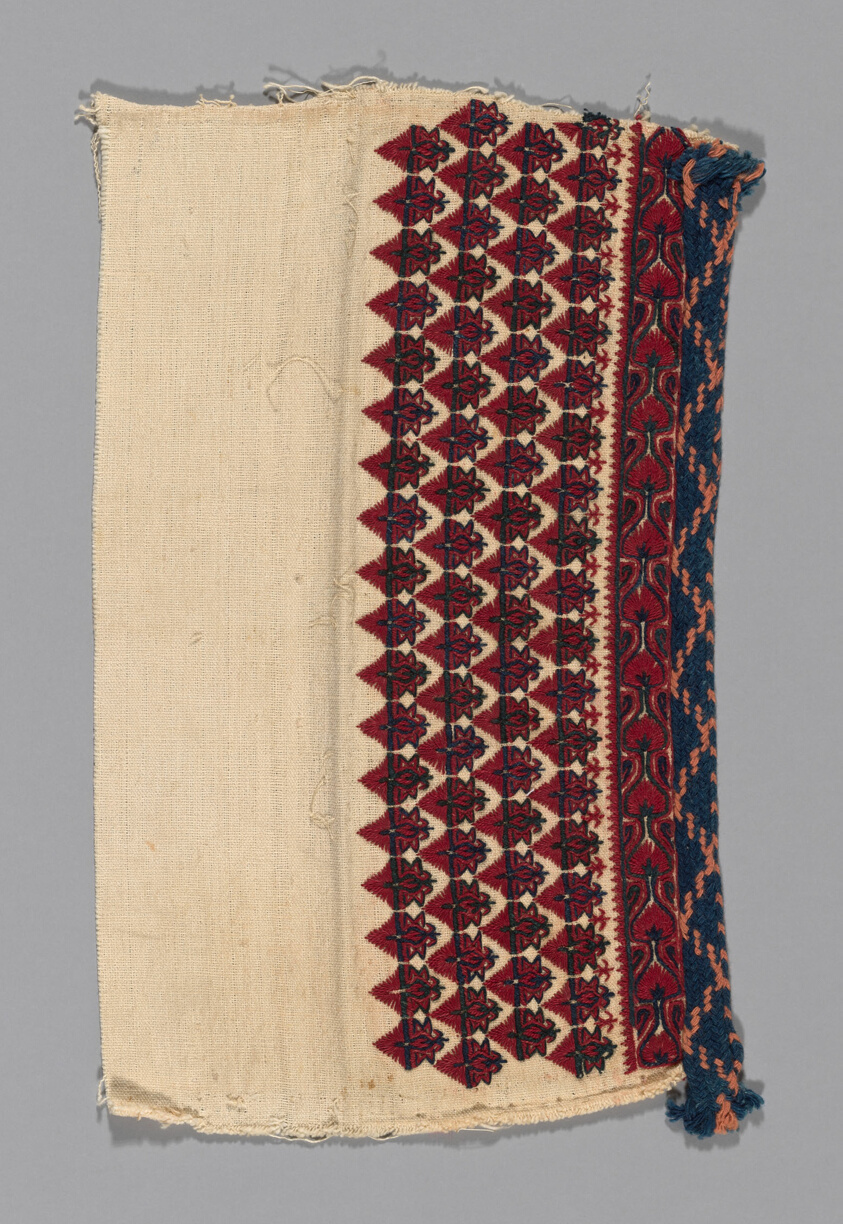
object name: Textile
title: Fragment (From a Border)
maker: Greece, Attica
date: 19th century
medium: Cotton, plain weave; embroidered with cotton in double running, satin, and stem stitches; edged with cotton, oblique interlacing tape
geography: Attica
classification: textile; needlework (visual works)